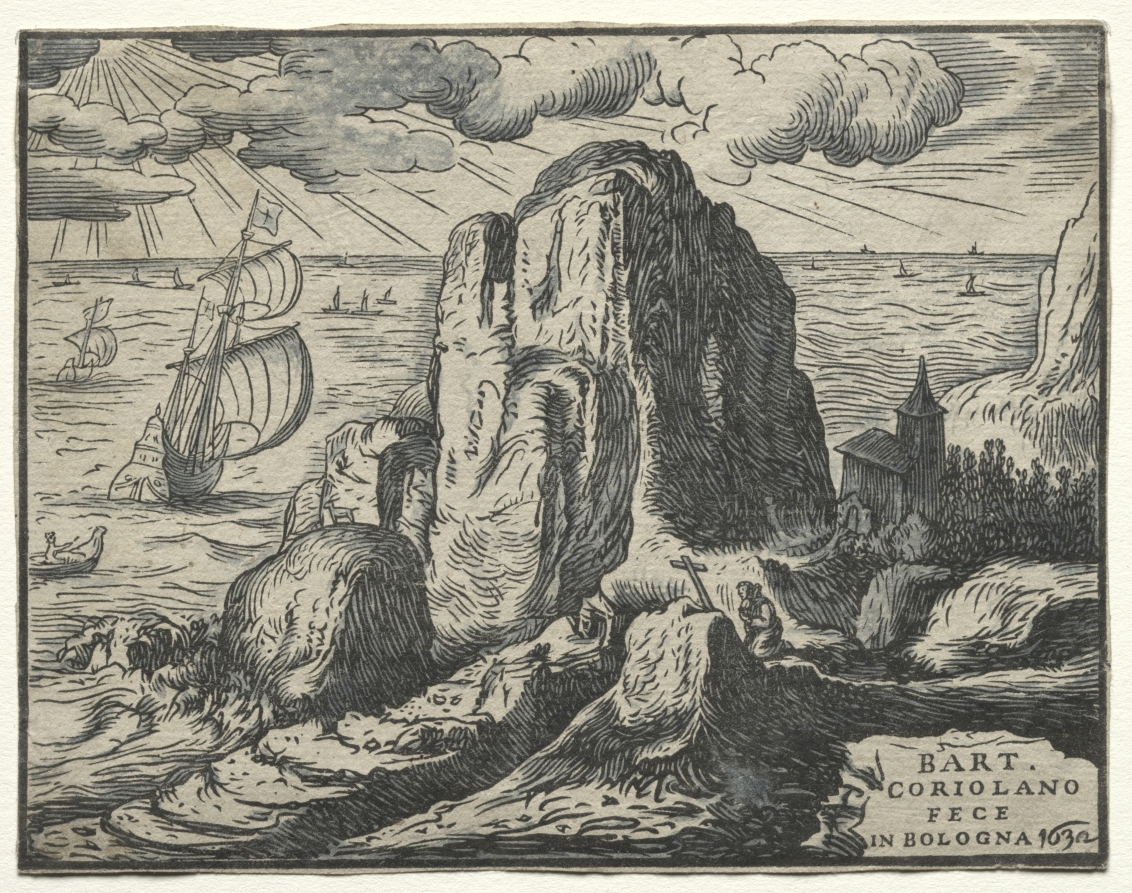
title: Cliff on the Seashore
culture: Netherlands, 16th century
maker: Bartolommeo Coriolano (Italian)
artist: after Hendrick Goltzius (Dutch, 1558–1617)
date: 1630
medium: chiaroscuro woodcut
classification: Print